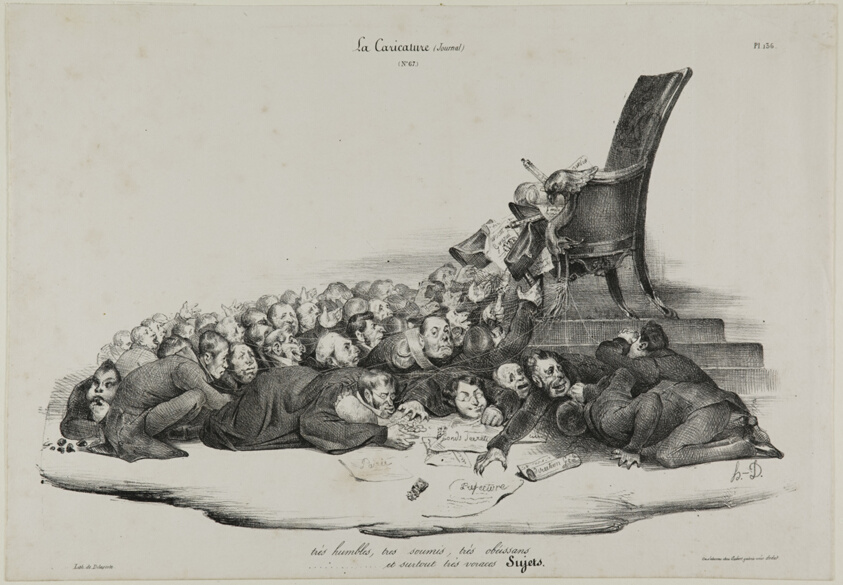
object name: Print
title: Very humble, very obedient, very submissive, and most of all, very voracious subjects, plate 136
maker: Honoré Victorin Daumier; French, 1808-1879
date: 1832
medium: Lithograph in black on white wove paper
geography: France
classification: lithograph; print; prints and drawing